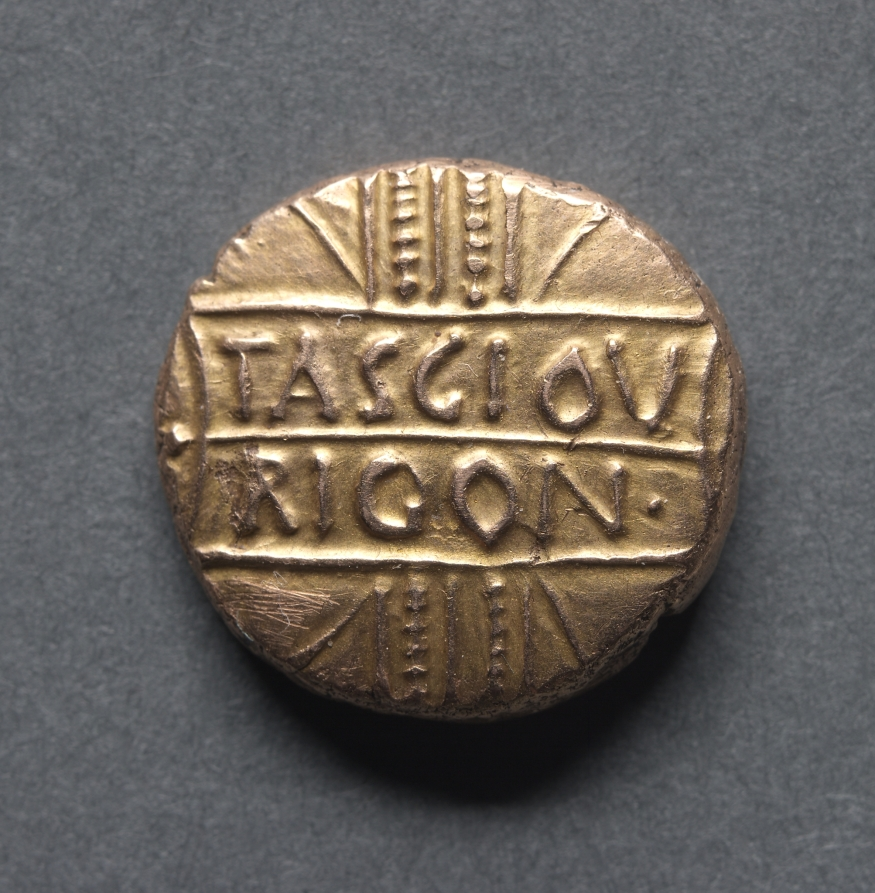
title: Tasciovanus Stater: Wreath (obverse)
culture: England, Catuvellauni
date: c. 20 BCE–10 CE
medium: gold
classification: Coins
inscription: TASCIOV RICON